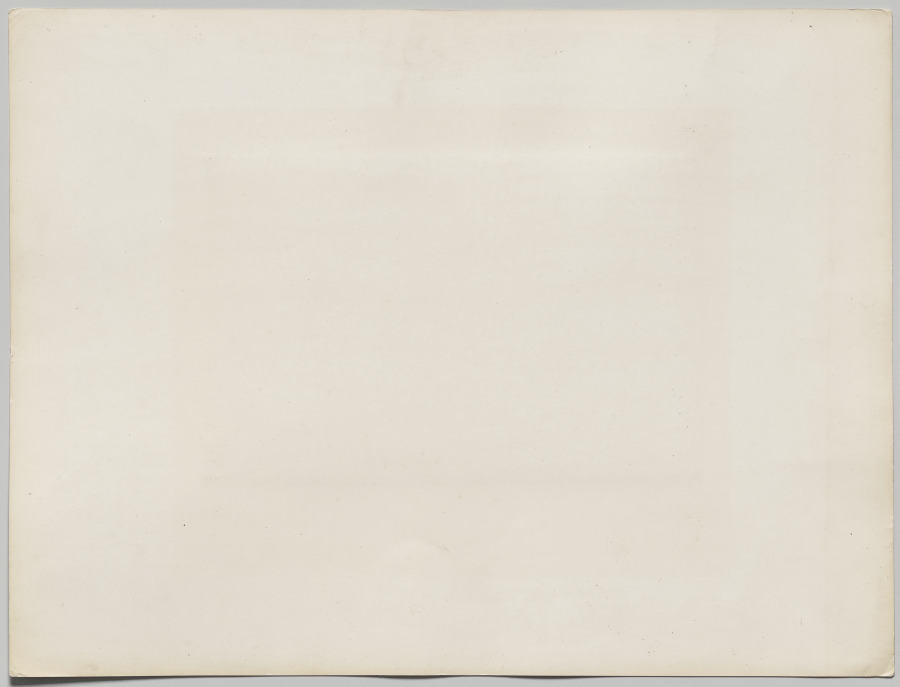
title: La Belle Jardinère: le magasin de la rue de la Cité pendant sa demolition, Paris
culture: France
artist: attributed to Charles Marville (French, 1813–1879)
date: 1864–66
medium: albumen print from collodion negative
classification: Photograph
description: In the 1850s and 1860s, Paris was transformed through a massive urban renewal program. Charles Marville photographed the demolition of the old Paris and the modern structures that replaced it. Here the old buildings of La Belle Jardinère, one of the first department stores in Paris, are being torn down to make way for a new hospital.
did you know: In the mid-1820s, the department store being demolished here introduced the idea of selling ready-to-wear clothing.